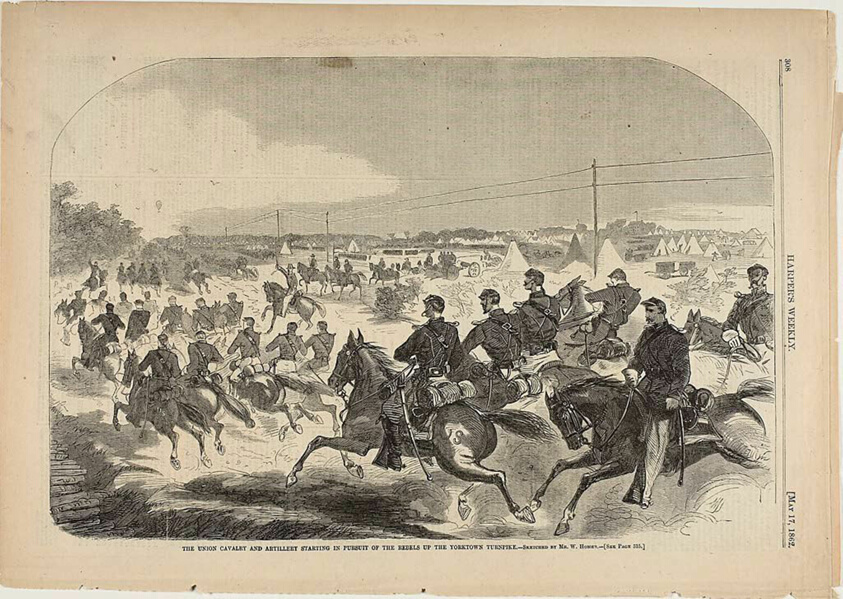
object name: Print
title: The Union Cavalry and Artillery Starting in Pursuit of the Rebels up the Yorktown Turnpike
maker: Winslow Homer (American, 1836-1910); published by Harper's Weekly (American, 1857-1916)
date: published May 17, 1862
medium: Wood engraving on paper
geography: United States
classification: wood engraving; print; prints and drawing